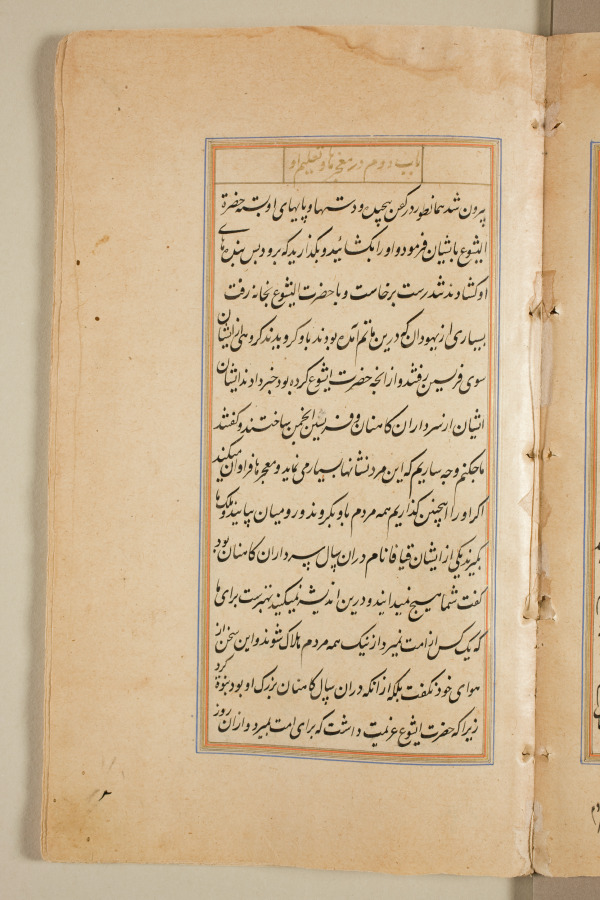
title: Text page from a Mirror of Holiness (Mir’at al-quds) of Father Jerome Xavier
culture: Mughal India, Allahabad, made for Prince Salim (1569–1627)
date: 1602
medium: Ink and gold on paper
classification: Manuscript